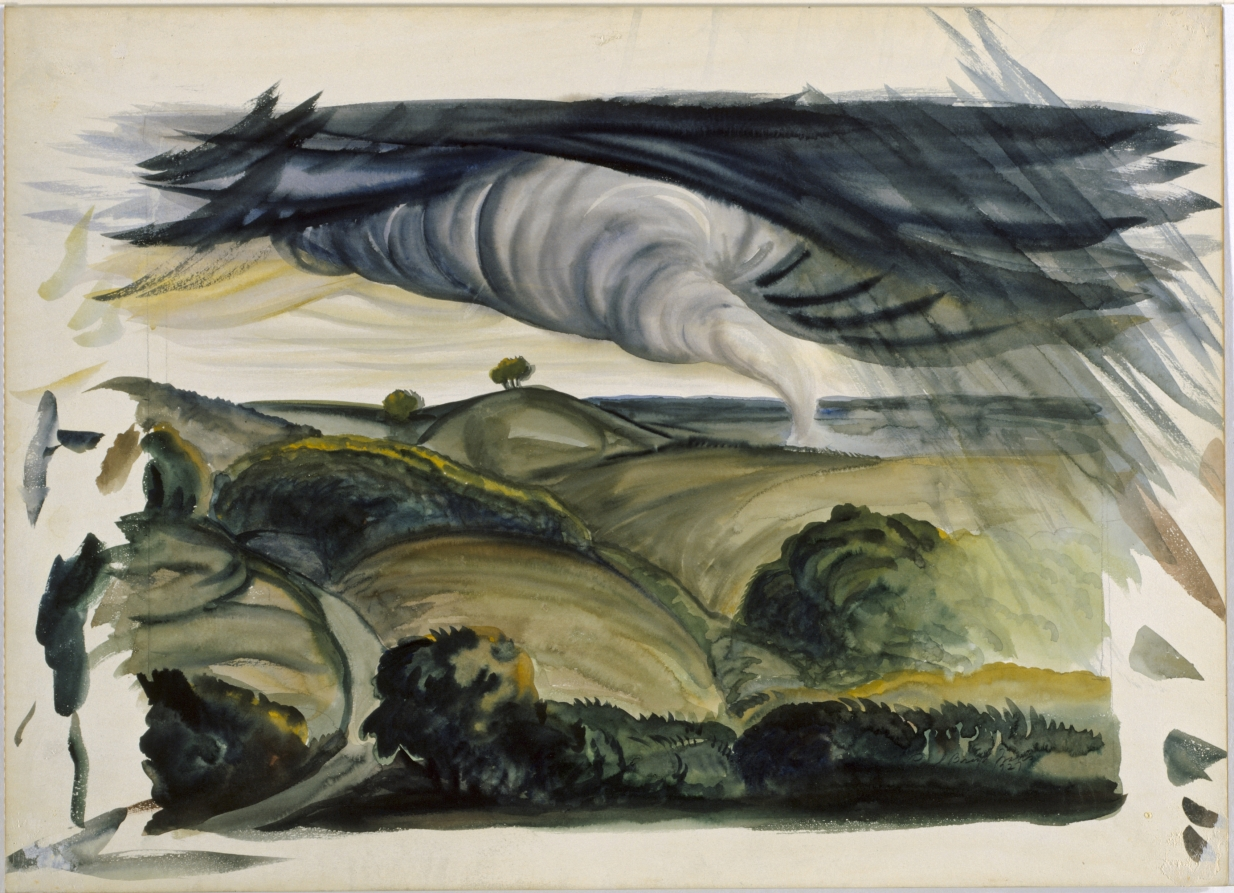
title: Tornado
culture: America, Ohio, Cleveland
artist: Paul B. Travis (American, 1891–1975)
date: 1927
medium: watercolor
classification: Drawing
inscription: Signed Paul Bough Travis 1927, lower right corner